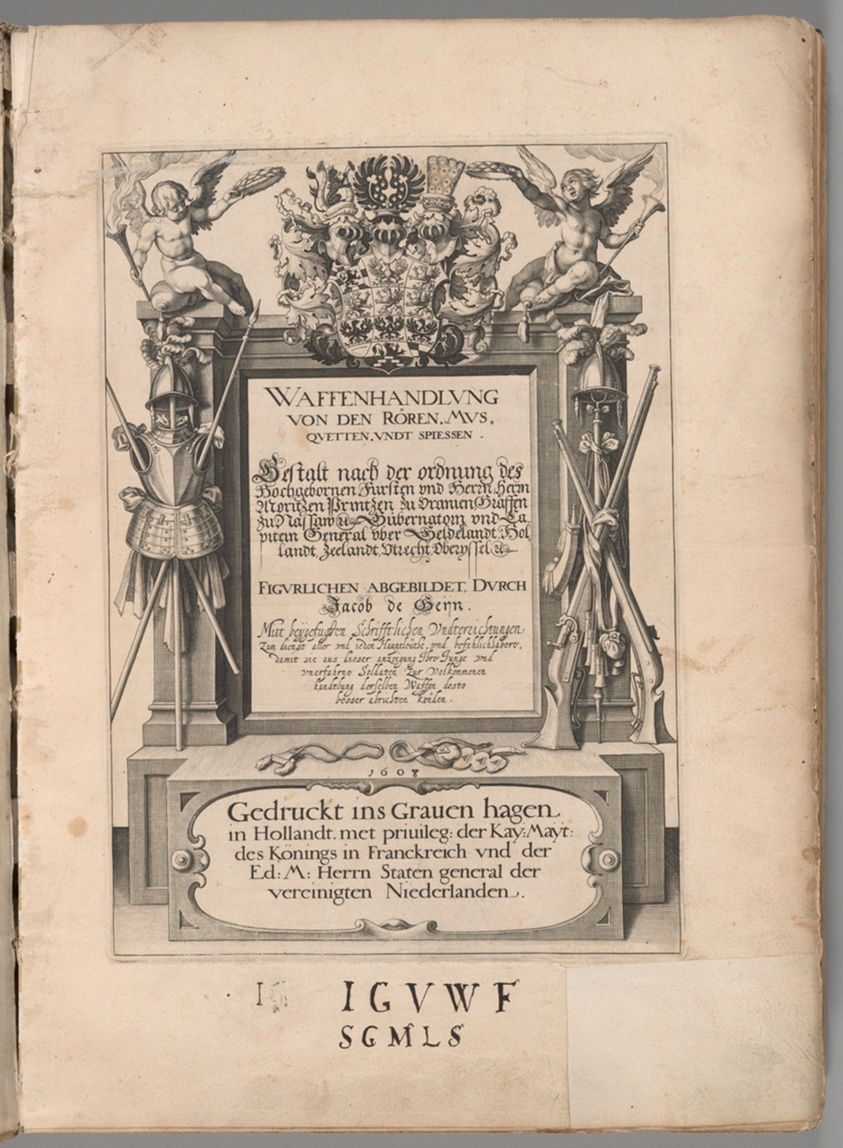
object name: Book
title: Exercise of Arms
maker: Jacob de Gheyn, II (Dutch, 1565-1629)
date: 1608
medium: Illustrated book featuring 117 copper plate engravings on ivory laid paper; full vellum binding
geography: Netherlands